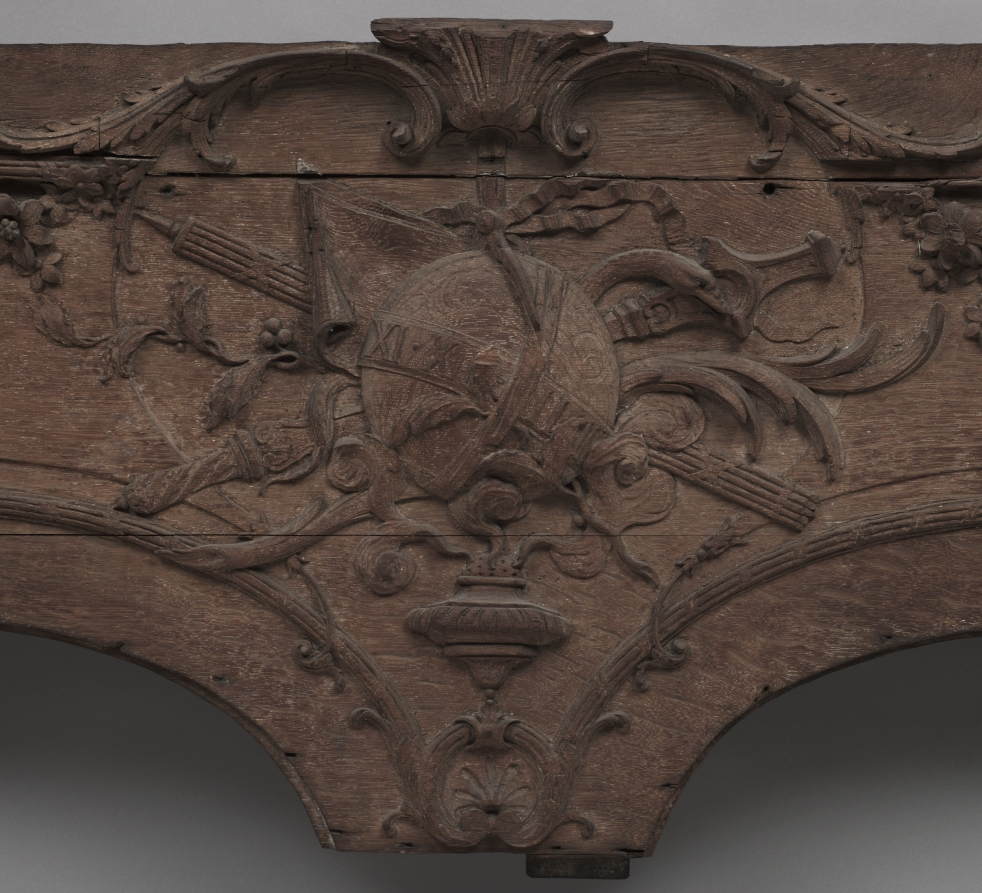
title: Panel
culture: France, Regency Period, 18th Century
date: 1715–1723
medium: wood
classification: Furniture and woodwork